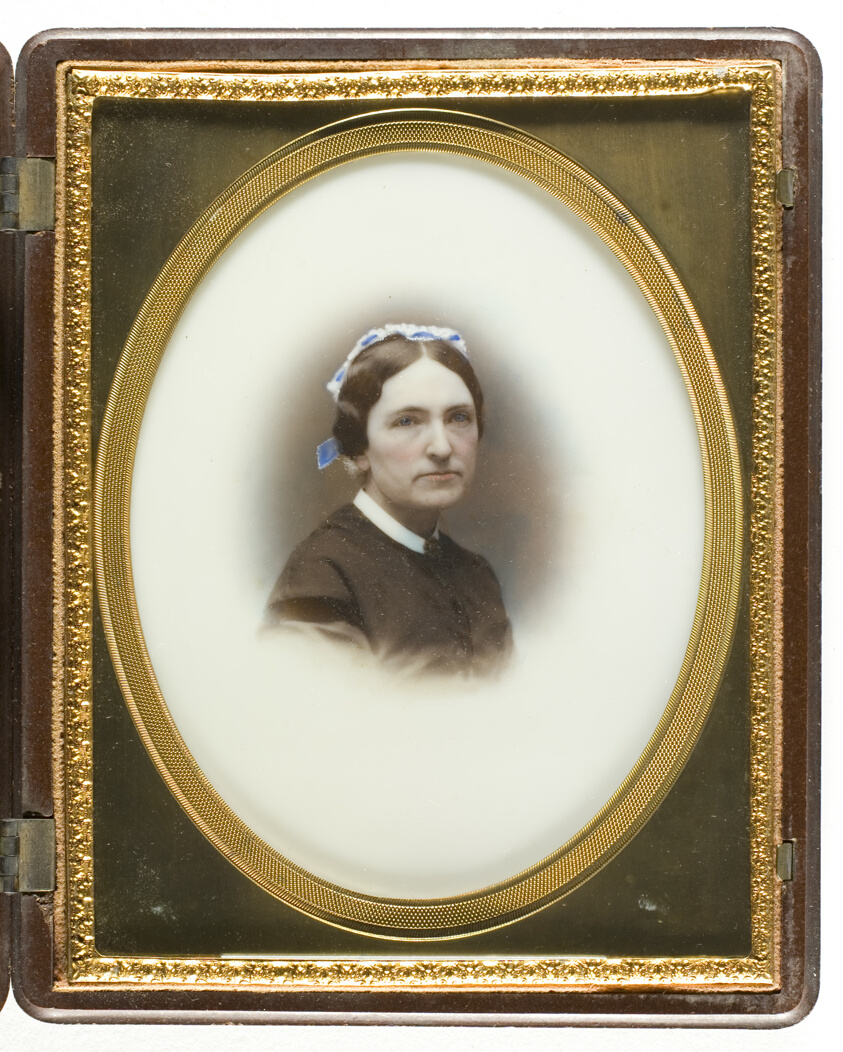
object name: Photograph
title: Untitled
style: 19th century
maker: Artist unknown; 19th century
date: 19th century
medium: Albumen on porcelain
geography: Unknown Place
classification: albumen silver print; photographic process; photography; photograph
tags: portraits, portraits: female subject, photography, formal portraits